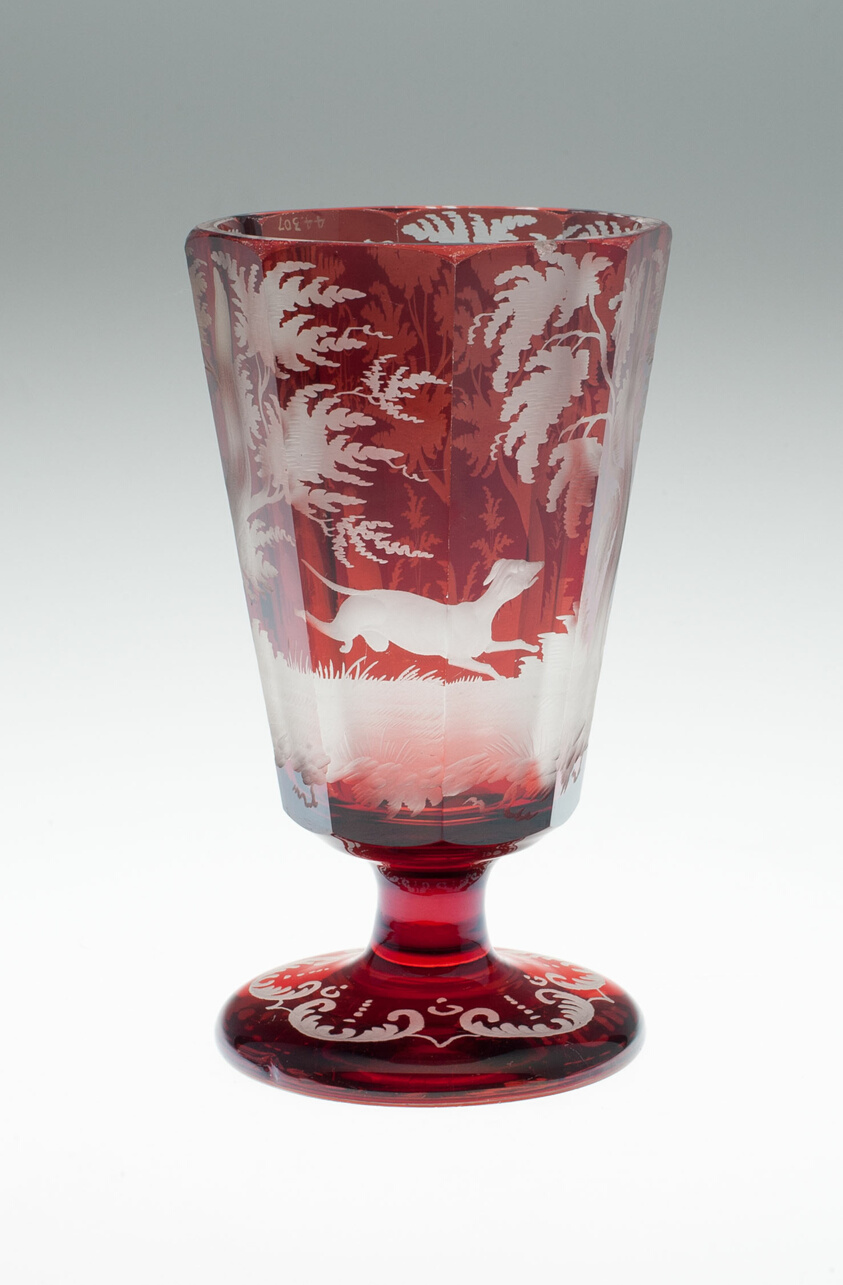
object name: Glass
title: Wine Glass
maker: Bohemia, Czech Republic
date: Mid to late 19th century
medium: Glass; blown, cut, stained red and engraved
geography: Bohemia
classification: drinking vessel; glass; european decorative arts